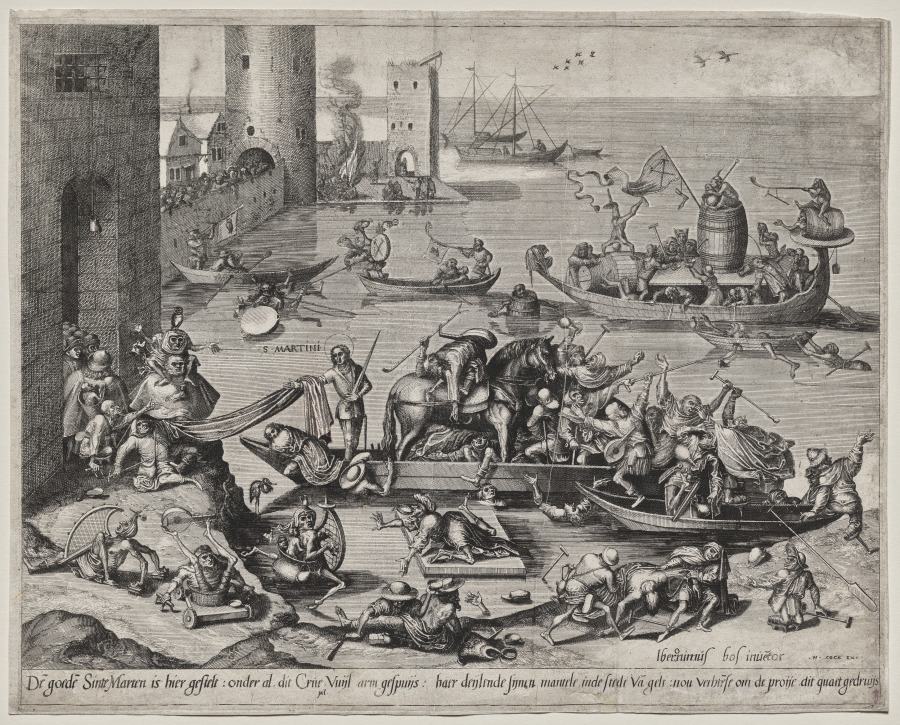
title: Saint Martin with His Horse on a Ship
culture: Netherlands, 16th century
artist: Johannes I van Doetecum (d. 1605)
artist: Lucas van Doetecum (active 1554–1572)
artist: after Hieronymous Bosch (Netherlandish, c. 1450–1516)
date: c. 1561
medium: etching on laid paper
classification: Print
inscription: Bottom right: Iher°nimùs bos inúetor; further right: H. COCK exc.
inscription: Text in legend below, De[n] goede[n] Sínte Marten is hier gestalt: onder al dit grue pel Vuijl arm gespuijs: haer deijlende sijnen mantele inde stede Va[n] gelt: nou Vechte[n]se om de proije dit quaet gedruijs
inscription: First state of three (i/iii)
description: During the 16th century, November 11 brought the feast day of Saint Martin in Northern Europe, accompanied by boisterous parties and drinking “St. Martin’s wine.” This print depicts one such feast gone awry, with the sins of gluttony, greed, and sloth on full display among the crowd of beggars and devils who fight for their chance at the wine, or for no apparent reason. In the center of the scene, Saint Martin stands ready to divide his cloak in order to share it with a beggar, the single act of charity in the scene.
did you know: The artist of this boisterous scene combined a saint’s charitable act with all manner of excessive behaviors that takes place in a contemporary coastal city much like that where the print was made.